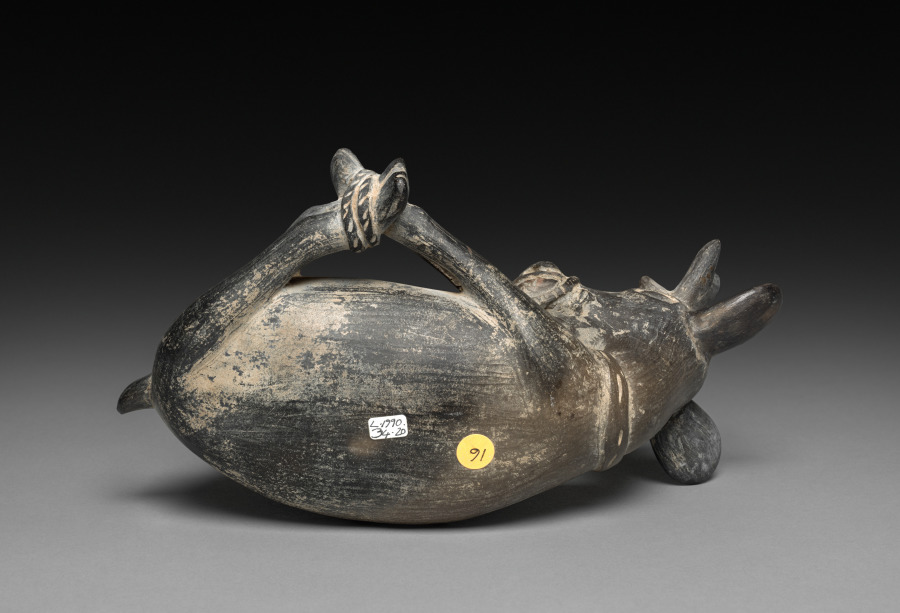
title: Bound Deer Effigy Vessel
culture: Andes, North Coast, Chimú people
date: 1000–1460s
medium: Ceramic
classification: Ceramic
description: This vessel was made by an artist of the Chimú Empire of Peru’s north coast. In the art of the Moche, an earlier culture in the region, the deer had complex symbolism related to ritual combat and the capture of prisoners. A memory of that symbolism may survive here in the binding of the deer’s feet.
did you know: Chimú potters fired their vessels in an atmosphere of reduced oxygen to achieve a uniform black surface.